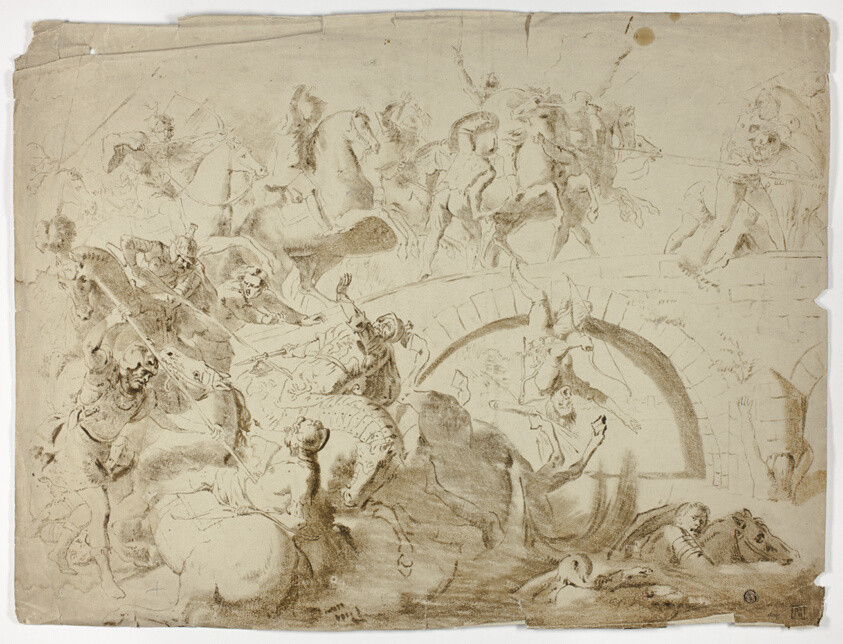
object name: Print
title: Battle of Ponte Molle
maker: Style of Leonard Bramer (Dutch, 1596-1674)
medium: Print (possibly early lithograph), with additions of brush and brown ink, on cream laid paper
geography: Netherlands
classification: pen and ink drawings; drawings (visual works); prints and drawing; print